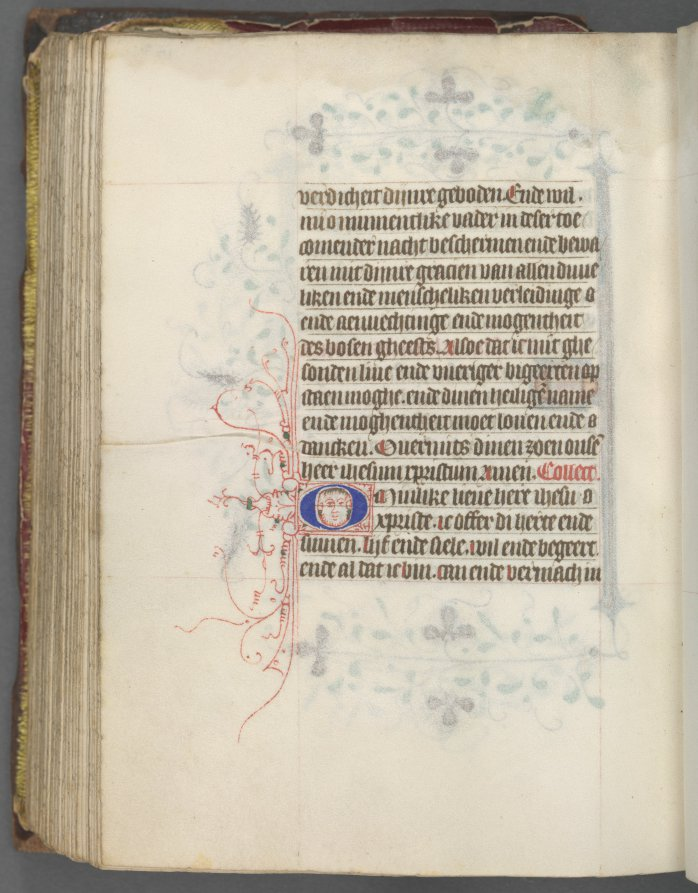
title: Book of Hours (Use of Utrecht): fol. 157v, Text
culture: Netherlands, Utrecht, 15th century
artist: Master of Gijsbrecht van Brederode (Netherlandish)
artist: Master of the Boston City of God (Netherlandish)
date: c. 1460–1465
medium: ink, tempera, and gold on vellum; binding: brown Morocco over original wooden boards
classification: Bound Volume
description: This manuscript is a collaborative effort of two talented illuminators with distinctive styles. Ninety-seven historiated initials (letters containing scenes), including the one on recto (right side) shown here, are by the Master of the Boston City of God, a painter who worked in Utrecht. Four full-page miniatures (small paintings), including the Nativity on the verso (left side), have recently been attributed to the Master of Gijsbrecht van Brederode. The background of the Nativity depicts a distant cityscape (perhaps Utrecht), adjacent to which may be seen the Journey of the Magi and the Annunciation to the Shepherds. In the left margin, the Virgin Mary (above) appears to the Roman Emperor Augustus and the Tiburtine Sibyl, who, according to legend, foretold the coming of Christ. This volume is not written in Latin, but in a Dutch littera textualis, an elegant Gothic bookhand.